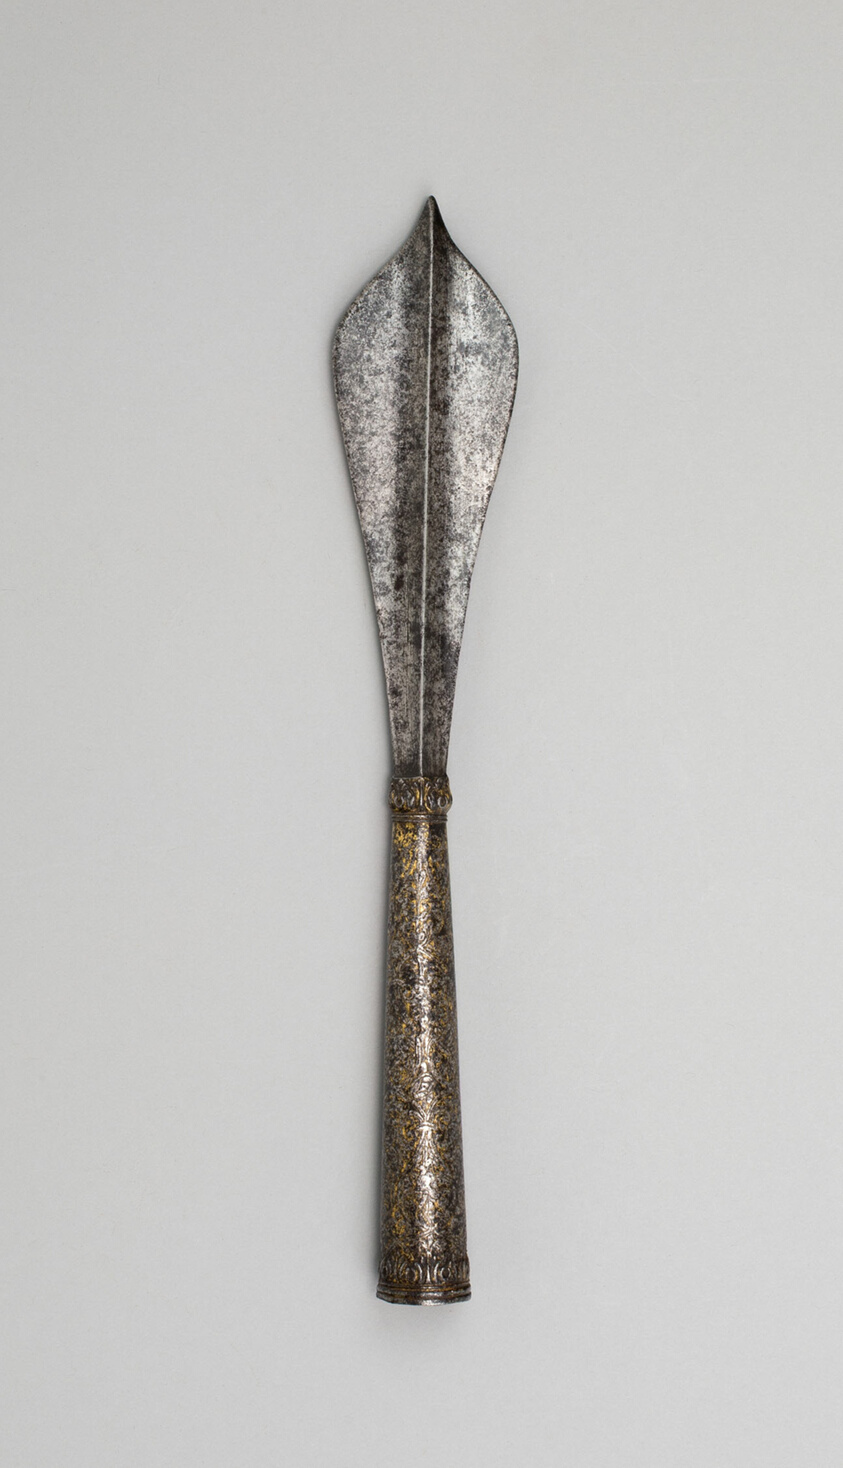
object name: Arms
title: Ceremonial Arrowhead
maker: Italian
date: 1500/1600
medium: Steel, gilding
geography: Italy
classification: edged weapon-staff; arms; arms and armor